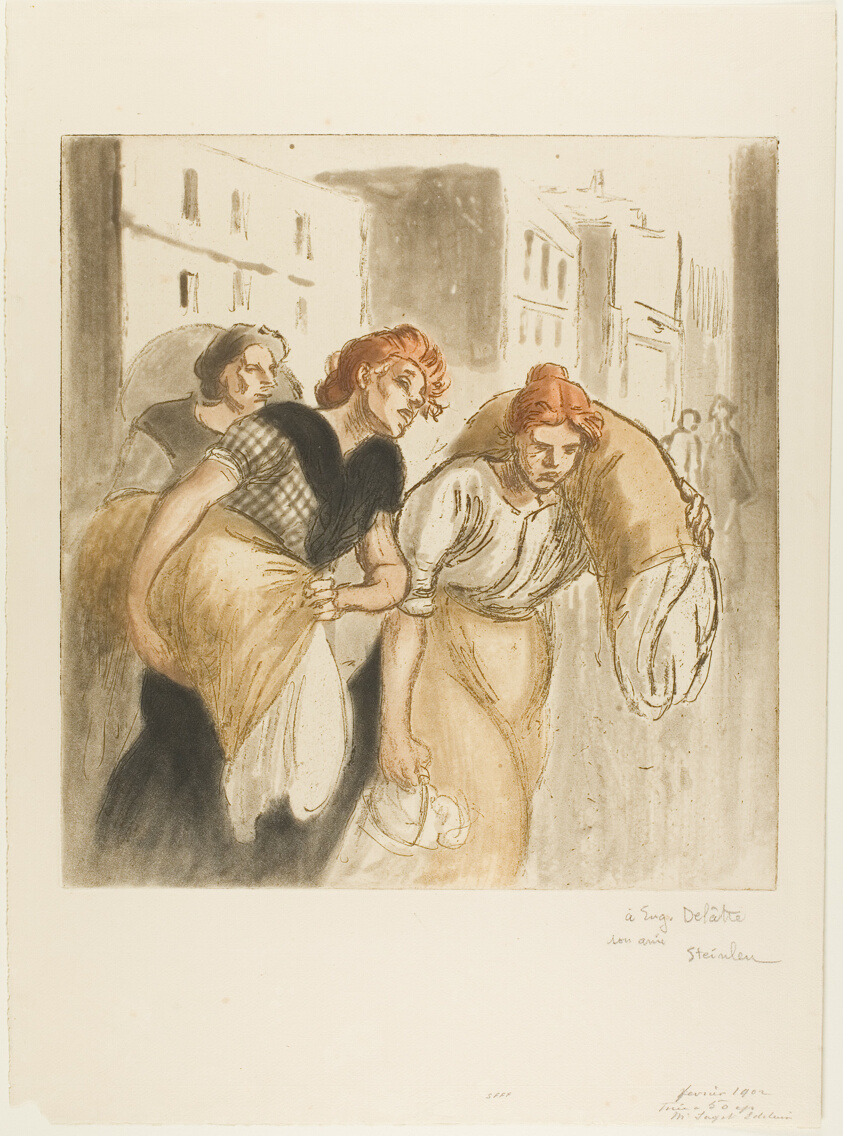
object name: Print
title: The Return from the Laundry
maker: Théophile-Alexandre Steinlen; French, born Switzerland, 1859-1923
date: February 1912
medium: Aquatint, soft ground and etching from a zinc plate in 4 colors (gray, brown, black and orange) on ivory laid paper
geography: France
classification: aquatint; print; prints and drawing